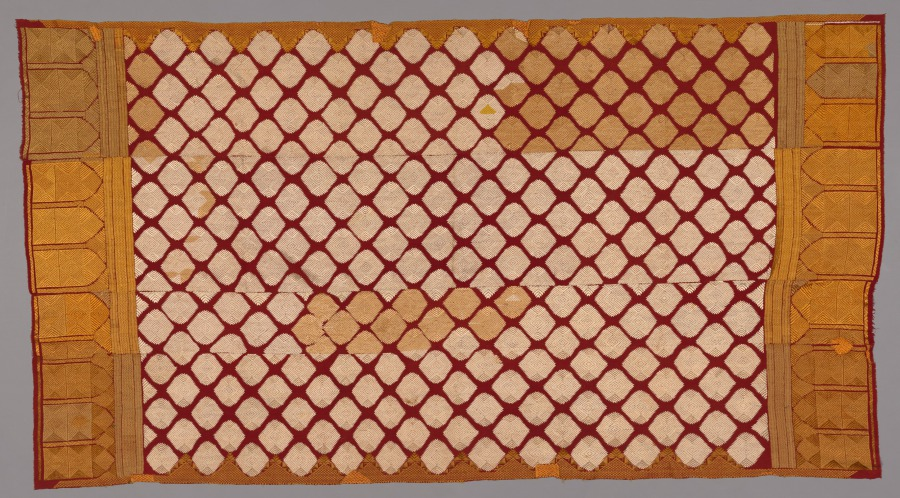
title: Head Shawl (Phulkari)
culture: India, Punjab, 19th century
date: 1800s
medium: embroidery; silk on cotton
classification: Embroidery